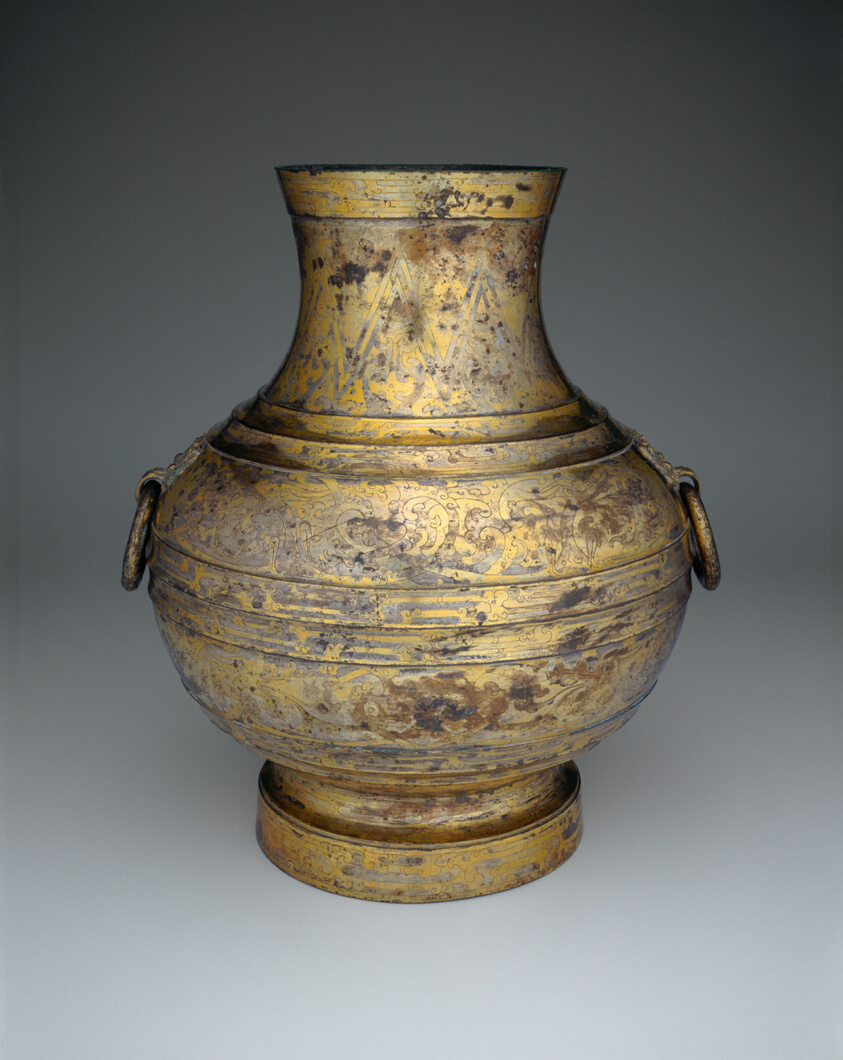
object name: Vessel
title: Jar (hu or zhong)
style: Chinese (culture or style)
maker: China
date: Western Han dynasty (206 B.C.–A.D.9)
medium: Bronze with gilding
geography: China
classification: vessel; bronze; vessel for serving drinks; metal; asian art